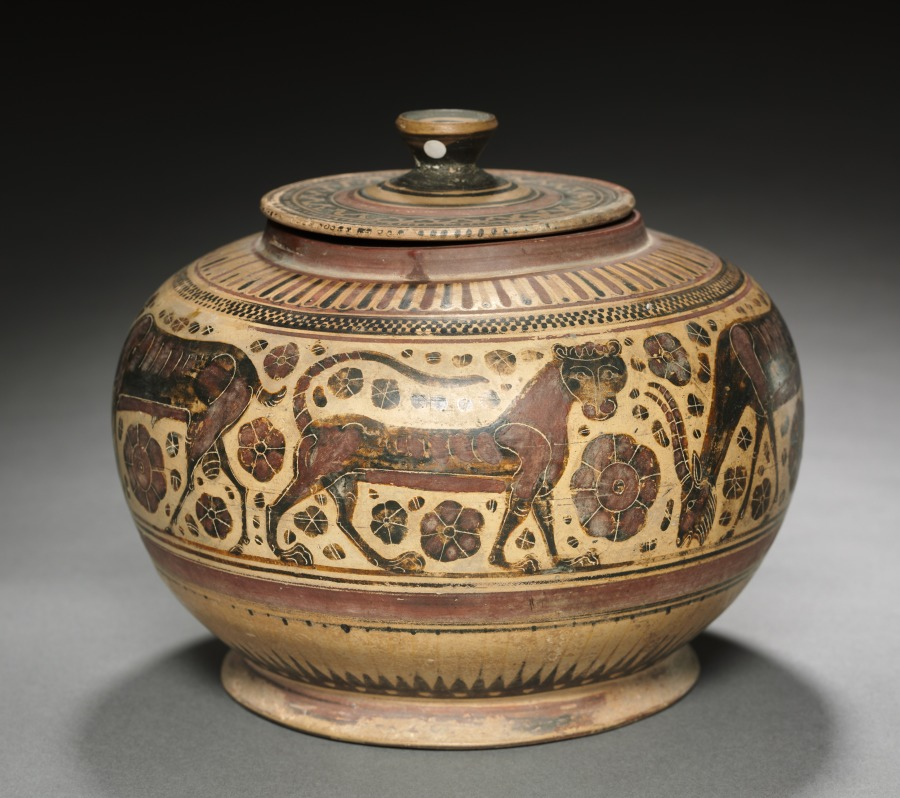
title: Black-Figure Pyxis (Cylindrical Lidded Box): Animals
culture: Greek, Corinthian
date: 600s–500s BCE, with modern painting and incision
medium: ceramic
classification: Ceramic